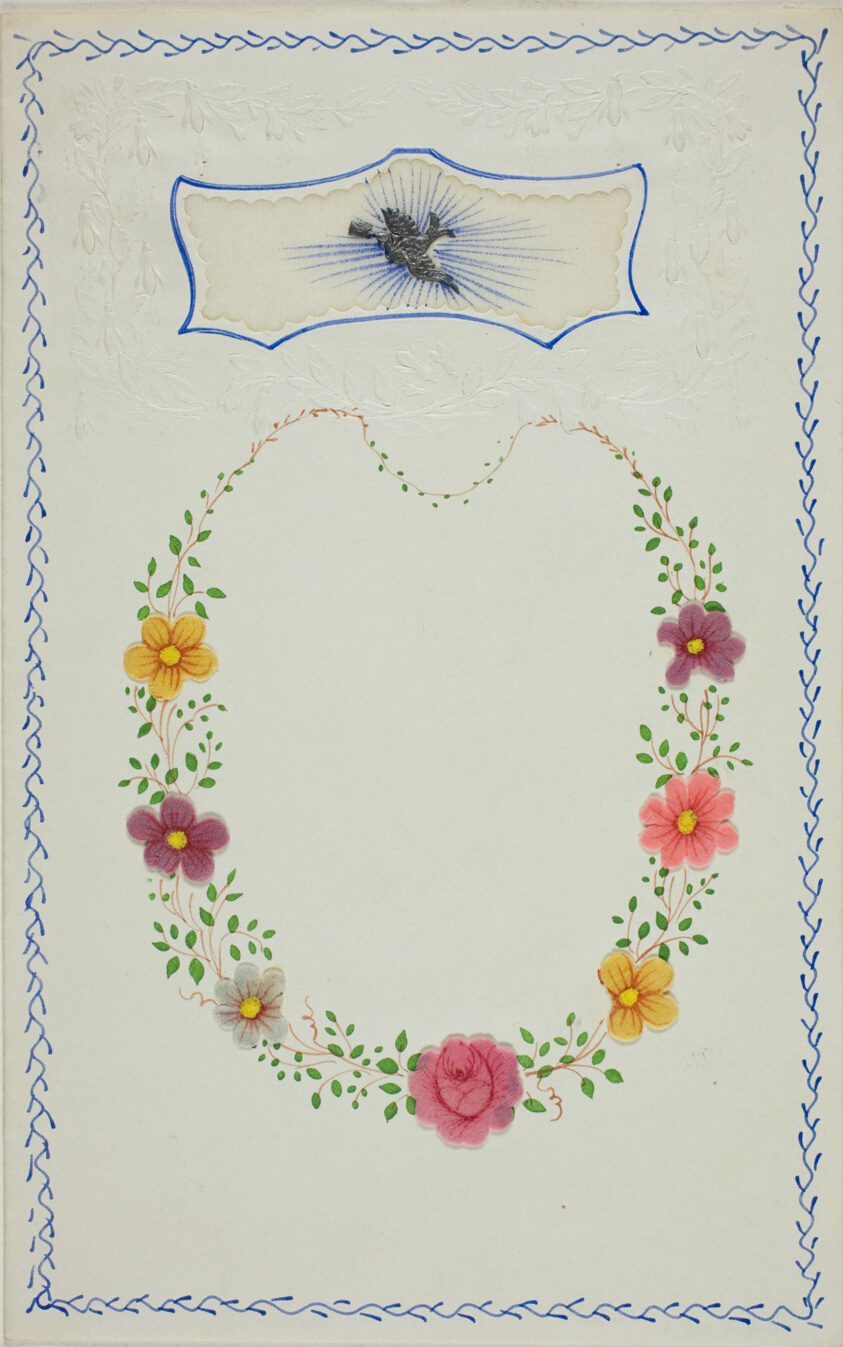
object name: Drawing and Watercolor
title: Untitled Valentine (Dove with Letter)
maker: Unknown Artist; English, 19th century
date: c. 1850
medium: Collaged elements and watercolor on cut and embossed ivory wove paper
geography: England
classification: valentine; prints and drawing; paper